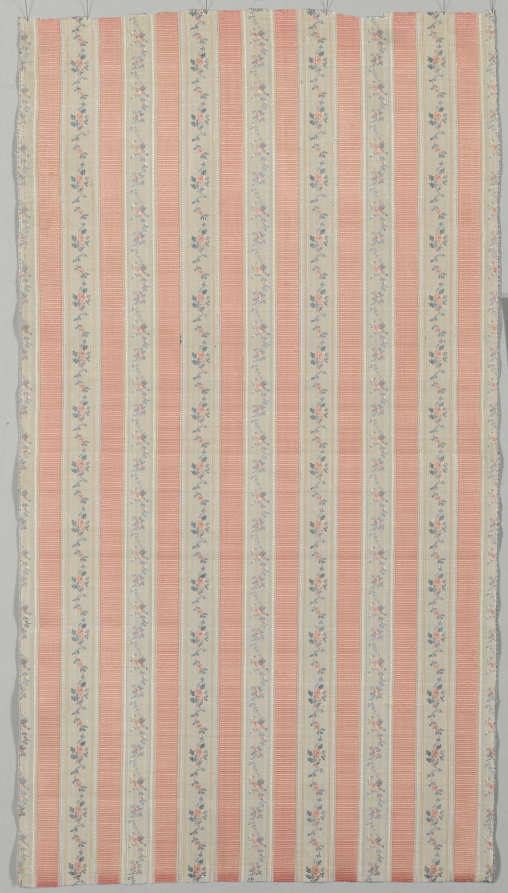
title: Length of Silk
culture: France, 18th century, Period of Louis XVI (1774-1793)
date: 1774–1793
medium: taffeta, warp-patterned; silk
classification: Textile